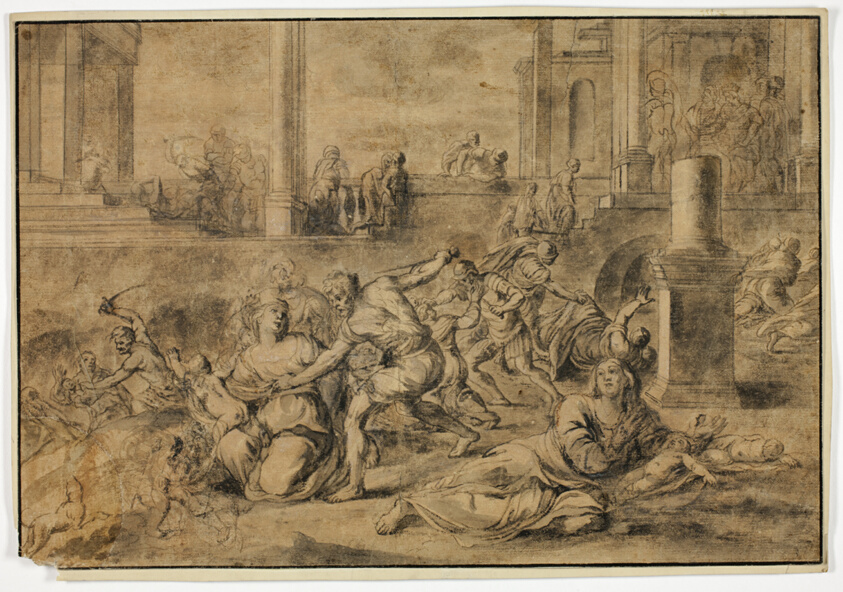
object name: Drawing and Watercolor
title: Massacre of the Innocents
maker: Unknown Artist; Flemish or French, 17th century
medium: Pen and brown and black ink and brush and black ink, with black chalk and brush and gray wash, on off white laid paper, tipped onto board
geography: Flanders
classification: pen and ink drawings; drawings (visual works); prints and drawing